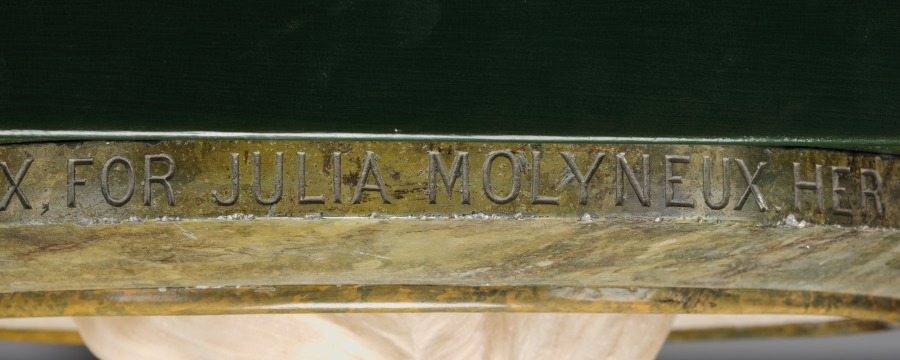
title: Mary, Lady Molyneux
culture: England, 19th century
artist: Alexander Munro (British, 1825–1871)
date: 1868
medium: marble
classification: Sculpture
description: Munro's method of portraying Lady Molyneux, with her head placed squarely in the center of a circle and her hair radiating outward from her face, gives the image an unusual emotional intensity that is probably the result of focusing relentlessly on the particular character of her features.